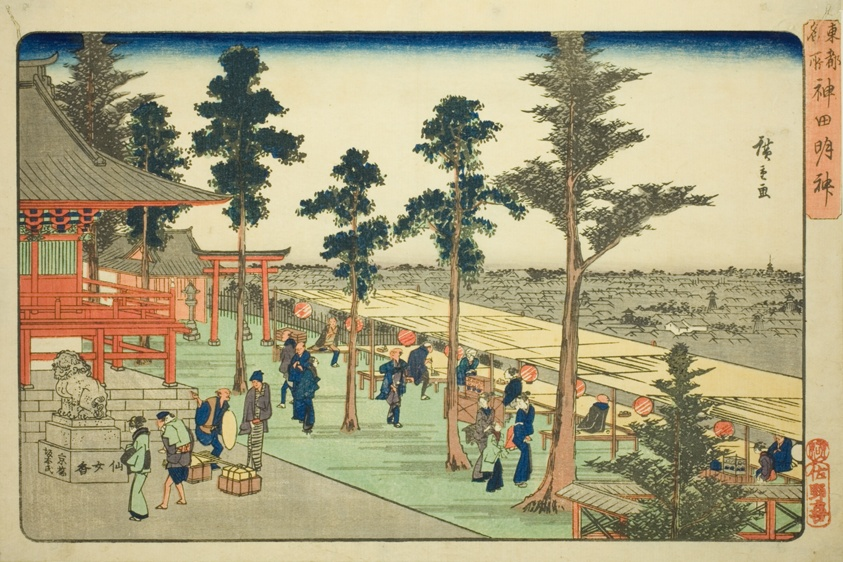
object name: Print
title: Kanda Myojin Shrine (Kanda Myojin), from the series "Famous Places in the Eastern Capital (Toto meisho)"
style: Japanese (culture or style)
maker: Utagawa Hiroshige 歌川 広重; Japanese, 1797-1858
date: c. 1832/38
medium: Color woodblock print; oban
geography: Japan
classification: woodblock print; print; asian art